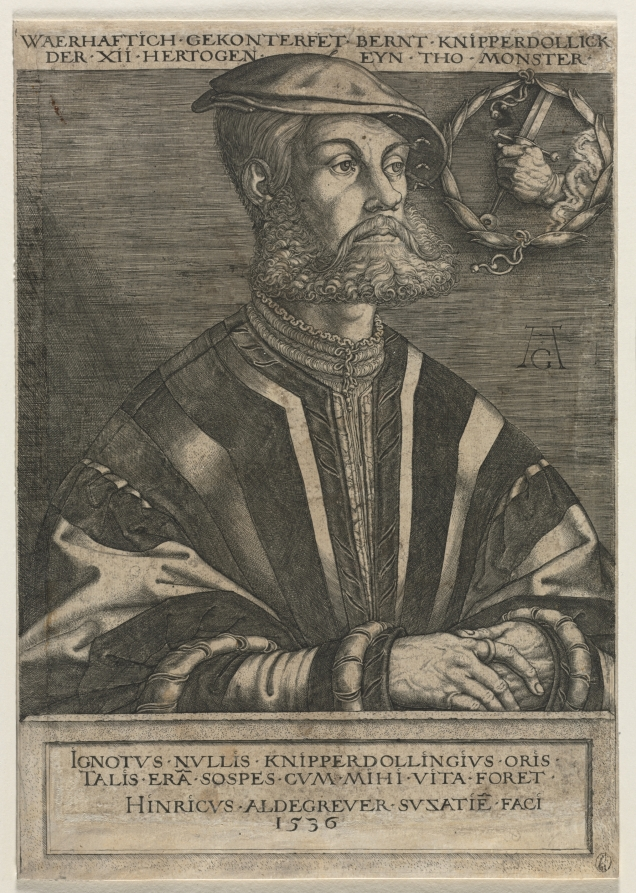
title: Bernt Knipperdolling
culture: Germany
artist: Heinrich Aldegrever (German, 1502–1555/61)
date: 1536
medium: engraving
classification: Print